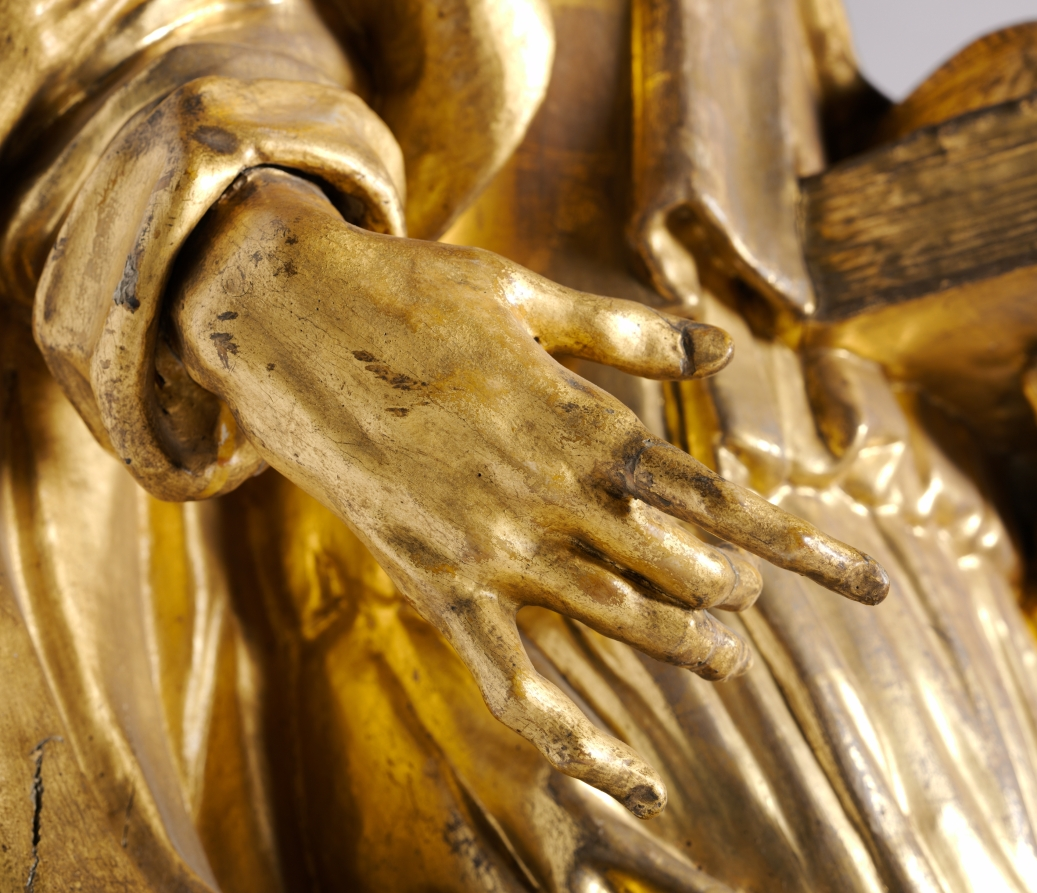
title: Saint Joachim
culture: Germany, 18th century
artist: Joseph Anton Feuchtmayer (German, 1696–1770)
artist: or Circle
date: c. 1760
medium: gilded wood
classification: Sculpture